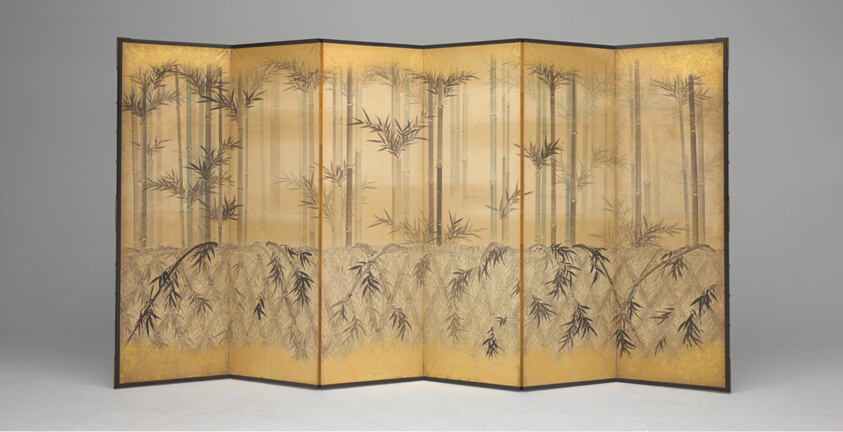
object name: Painting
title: Bamboo and Fences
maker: Tosa Mitsuoki (Japanese, 1617-1691)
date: 1654/81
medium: One of a pair of six-fold screens, ink and light color on paper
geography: Japan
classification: screen; painting; asian art